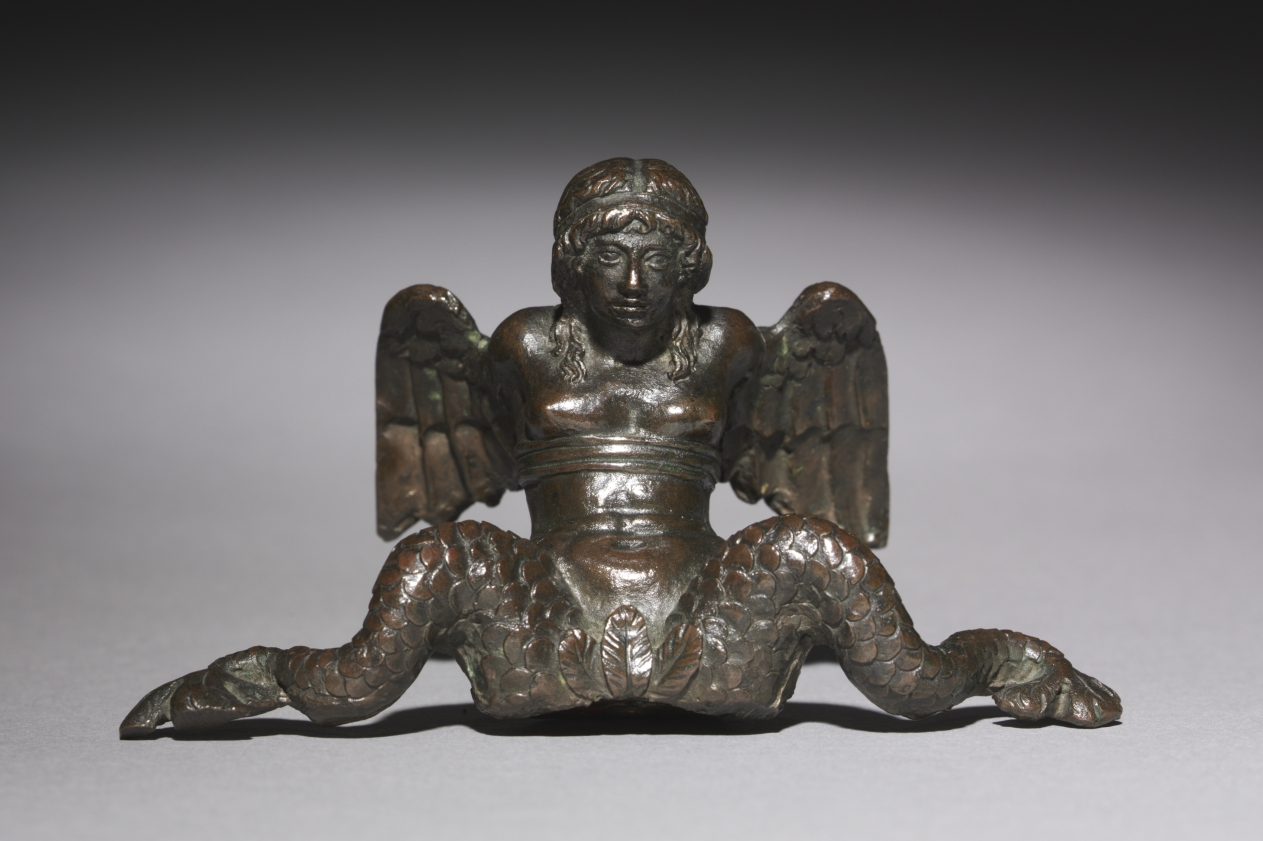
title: Doorpull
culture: Italy, 16th century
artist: Leone Leoni (Italian, 1509–1590)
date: 16th century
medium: bronze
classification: Sculpture